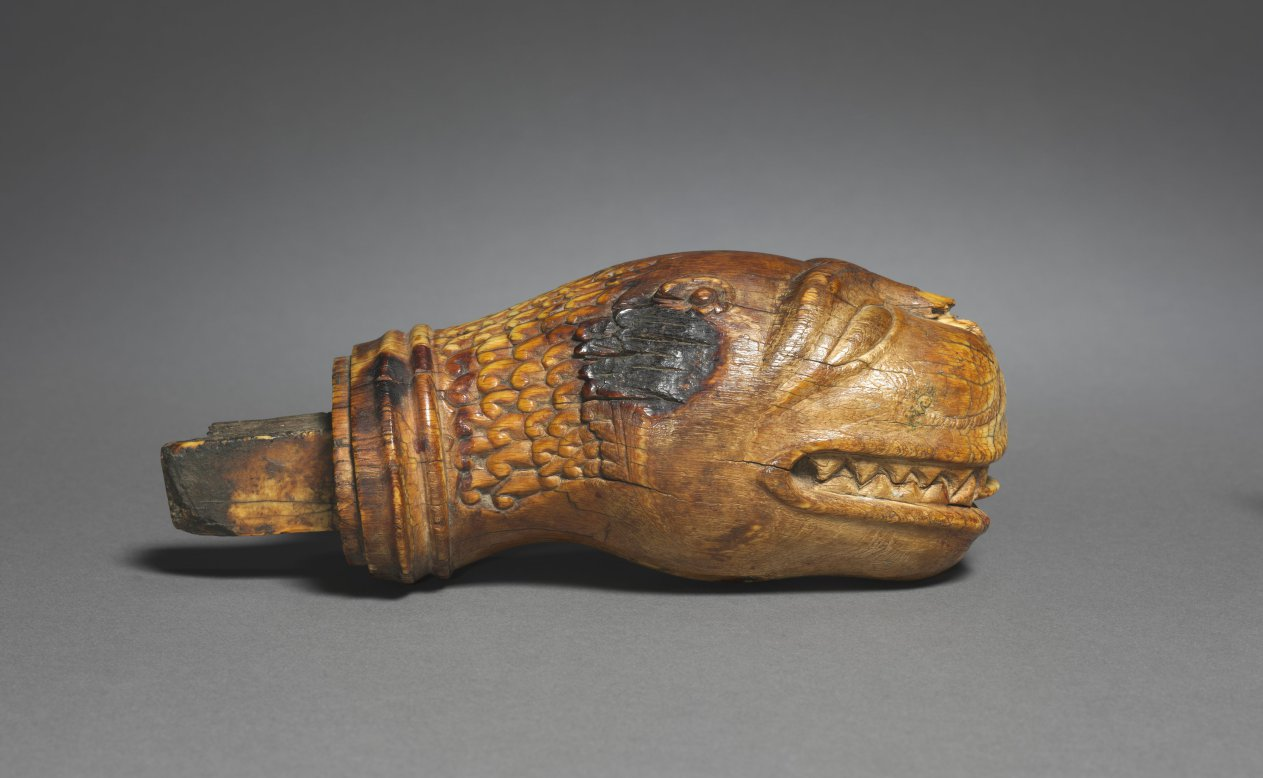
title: Lion's Head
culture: India, Mughal period (1526-1756)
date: 17th Century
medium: ivory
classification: Ivory